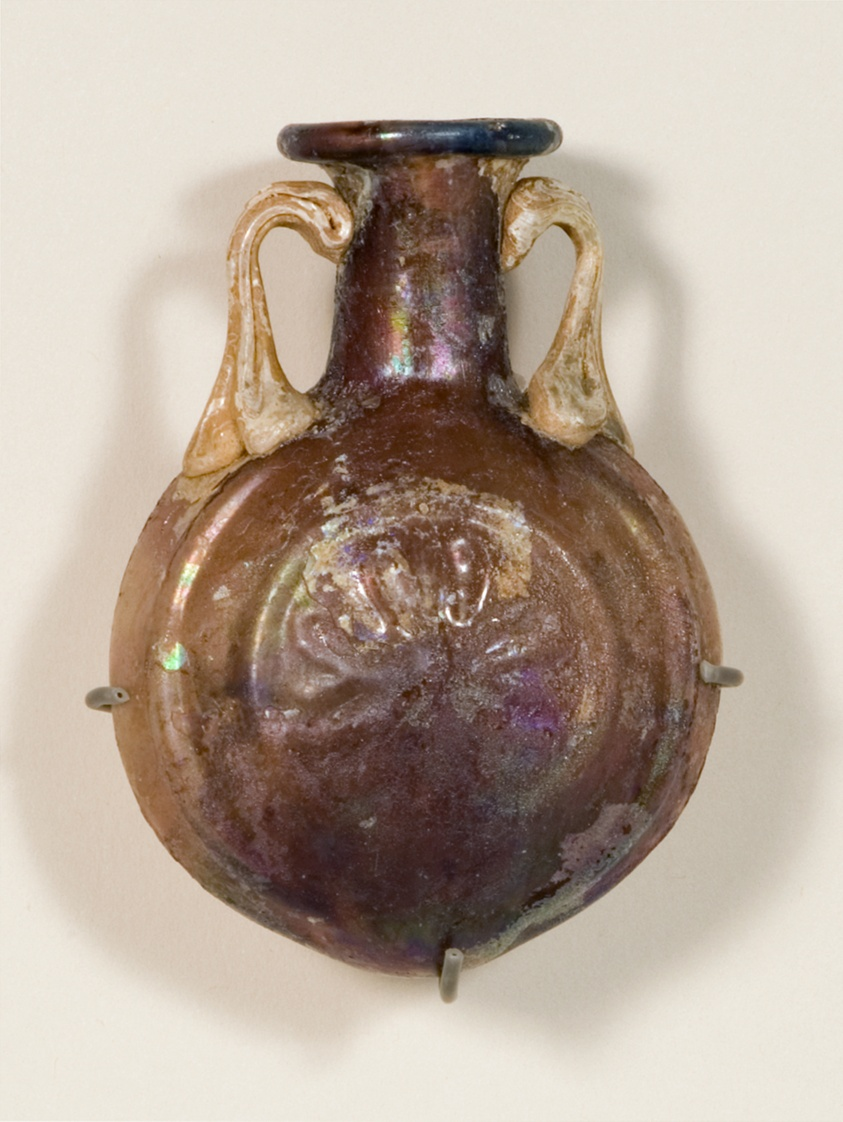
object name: Vessel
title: Bottle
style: roman (ancient, style or period), ancient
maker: Roman; Syria or Palestine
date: 1st century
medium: Glass, mold-blown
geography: Roman Empire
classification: bottle; glass; vessel; ancient art